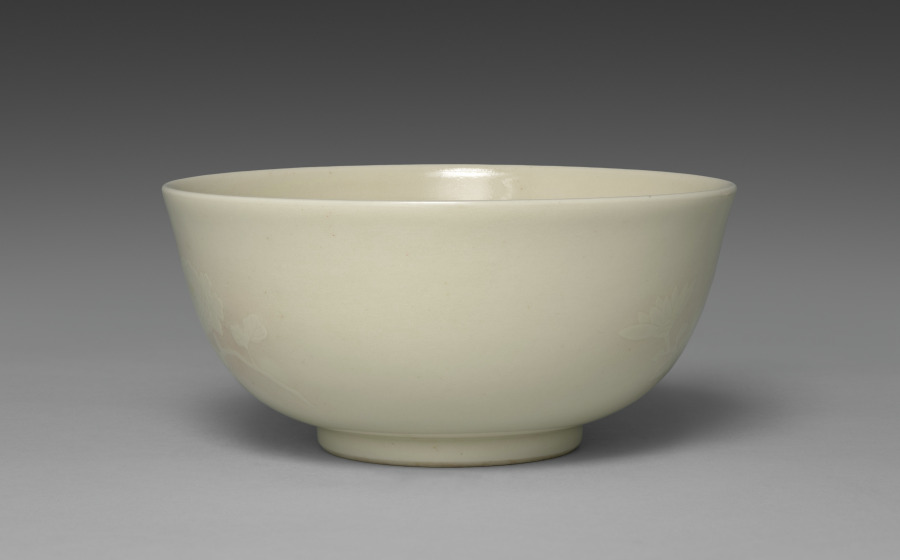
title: Sweets Bowl with Chrysanthemums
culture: Japan, Taishō period (1912–26) or Shōwa period (1926–89)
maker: Seifū Yohei IV (Japanese, 1872–1951)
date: 1914–46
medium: Porcelain with molded and carved design, underglaze color, and cream glaze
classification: Ceramic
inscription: 清風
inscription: 成山清風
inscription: 清風造 【印】 清風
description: Sweets bowls hold the confections enjoyed when drinking tea. This bowl and CMA 2022.206 offer an important lesson in appreciating Yohei IV’s ceramic practice. While they have the same design and shape and are made with the same materials, the execution of the pieces makes them entirely different after close inspection, thereby demonstrating the range of possible production results from a single template. Each bowl has the same composition of two different types of chrysanthemum flowers, one with long, slim, knifelike petals and the other with short, rounded, multilayered petals, shown running around its surface in low relief. The centers of the flowers are painted with yellow under the glaze. Yohei III formulated a number of new underglaze colors during his career, and this is likely one of them. For both bowls here, Yohei IV used his father’s kanpakuji formula, with underglaze pink for the gradated wash of color surrounding the flowers. The storage box lid provides abbreviated descriptions of the complex processes used in the surface decorations. It identifies the bowl as “Sweets dish with carved picture of chrysanthemum in kanpakuji.” The box has Yohei IV’s signature on the lid’s exterior, along with a seal reading “Seizan Seifu” 成山清風. The ink inscriptions are done in an elegant semiformal calligraphy. This bowl is more subtle and smooth in both the effect of the glaze and the execution of the relief. The designs are centered on the body between rim and foot. A closer look at the delineation of the flower petals reveals that the designs differ at times with respect to which petals appear in front or behind others. The centers of the bases of both bowls are incised with “Seifu” in a manner matching many other works by Yohei IV, although there are slight differences. As one might expect from the other differences in the bowls, the characters on the base of this subtle bowl are gentler, finishing in a tapering out of the strokes. Those on the bold bowl, CMA 2022.206, end in triangular pinheads.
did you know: This ivory and pink bowl by Seifū Yohei IV show his father’s “bright-jewel white porcelain” technique.